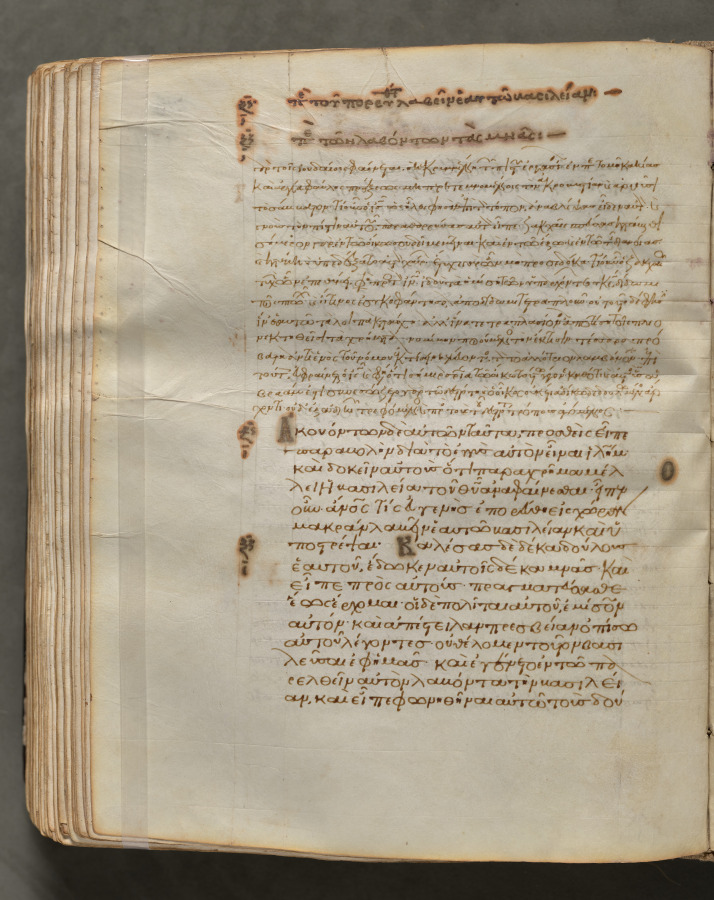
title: Text, folio 294 (verso), from a Gospel Book with Commentaries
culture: Byzantium, Constantinople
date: c. 1000–1100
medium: ink, tempera, and gold on vellum; leather binding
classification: Bound Volume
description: Each of the four gospels in this book opens on a page with brilliantly illuminated borders depicting the author of the text as well as birds—principally peacocks, symbols of the immortality of the soul—and fountains, representing the fountain of life and the salvation of the soul. This volume consists of 428 leaves with texts in Greek. Its level of sophistication suggests that it was probably written and decorated in a monastery in Constantinople.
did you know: Gospel books were carried in procession through Byzantine churches.